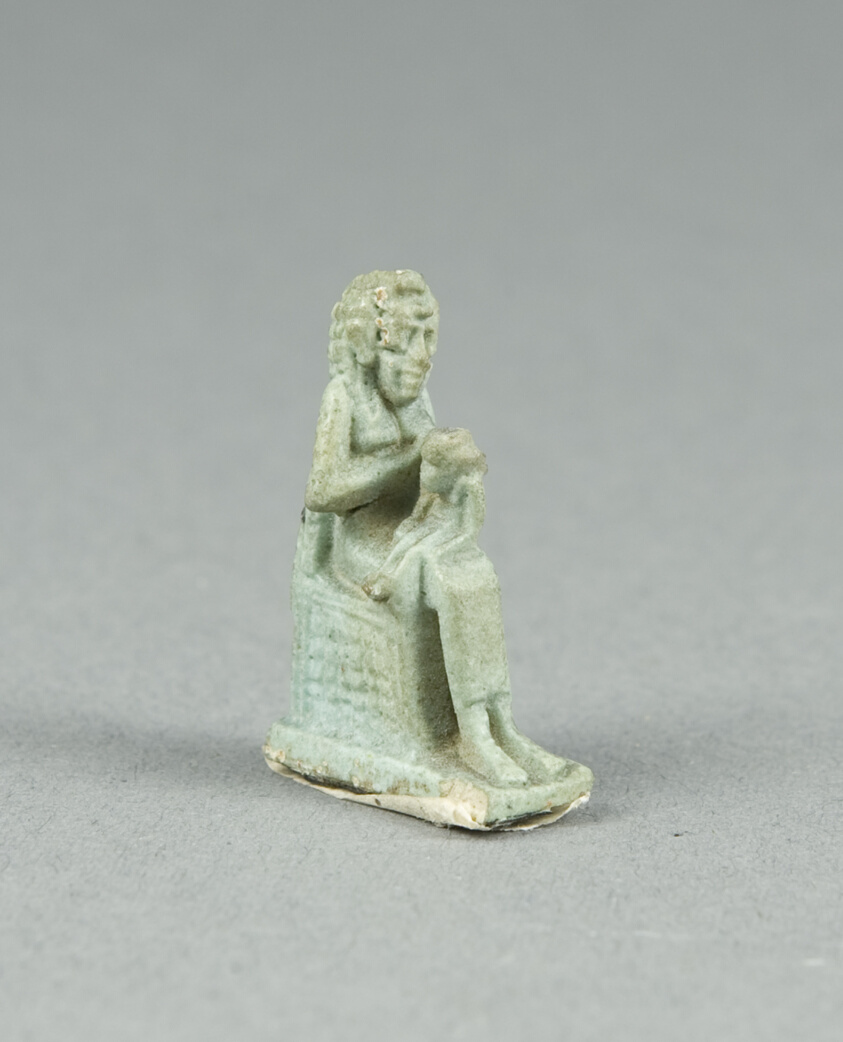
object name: Costume and Accessories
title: Amulet of Isis Holding Horus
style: egyptian, ancient, greco-roman (egyptian), late period (egyptian), ptolemaic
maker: Egyptian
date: Late Period–Ptolemaic (7th to 1st centuries BCE)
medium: Faience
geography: Egypt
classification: amulet; jewelry; ancient art; costume; faïence (composite material)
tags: deities, goddesses, gods (deities), mother and child, nursing (breast feeding)